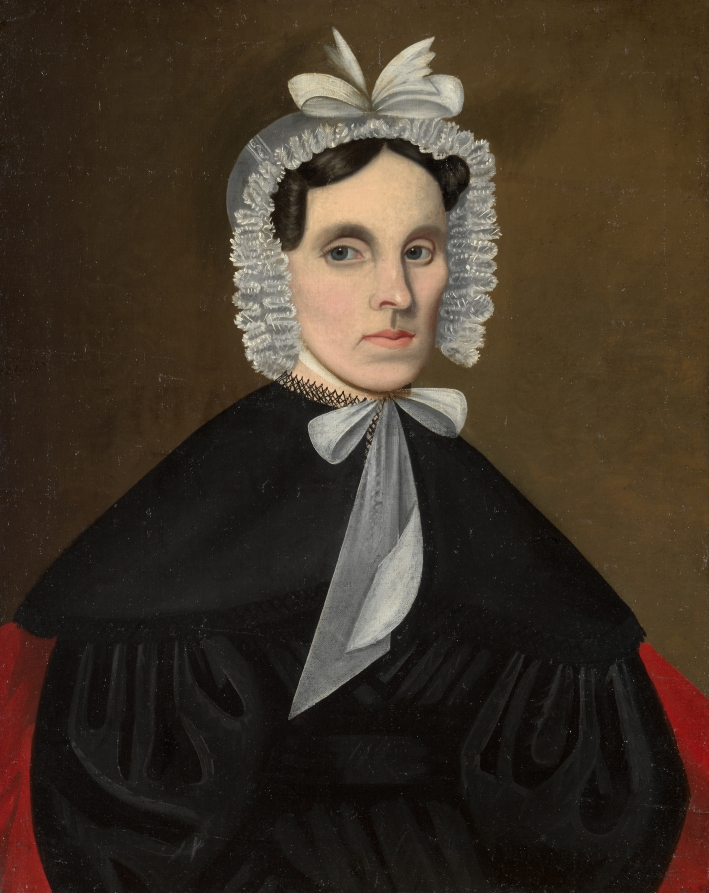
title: Sally Avery Olds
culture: America, Ohio, Cleveland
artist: Jeptha Homer Wade (American, 1811–1890)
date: 1837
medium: oil on canvas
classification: Painting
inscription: signed on the back: J.H. Wade / 6-37-17 / Farmer Valley